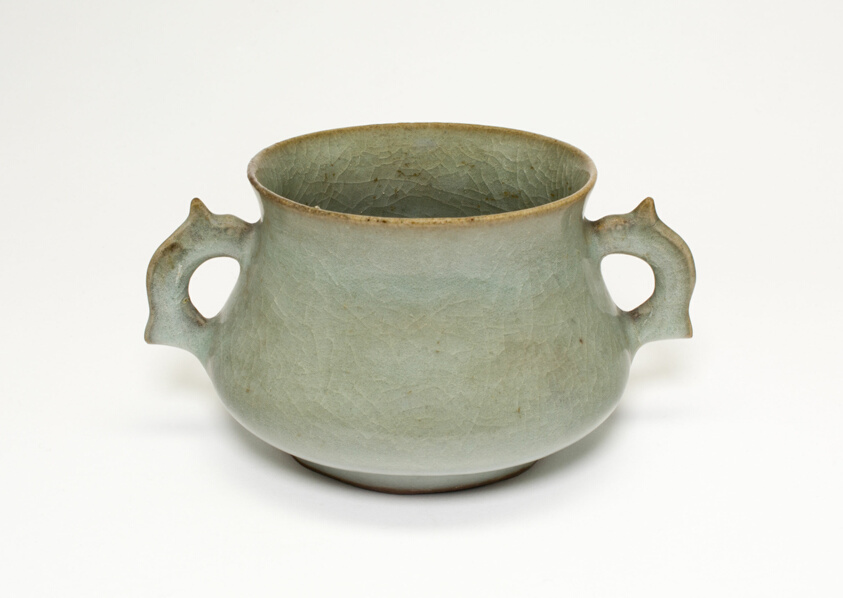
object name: Decorative Arts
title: Incense Burner with Animal Handles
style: Chinese (culture or style)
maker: China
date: Northern Song dynasty (960–1127), 11th –12th century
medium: Guan ware; celadon-glazed stoneware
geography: China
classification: porcelain; asian art; ceramics; decorative arts